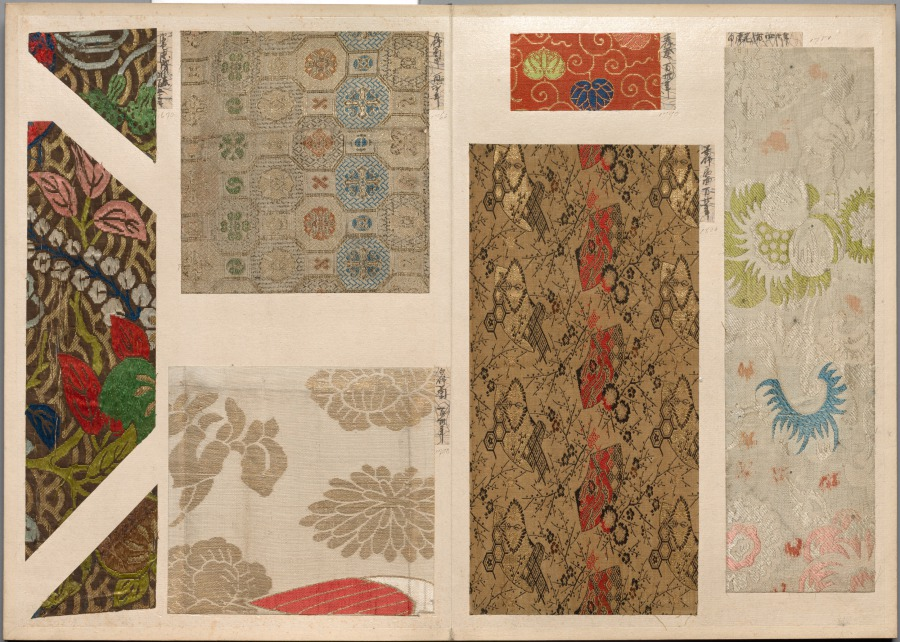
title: Album of Textile Samples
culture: Japan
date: 1790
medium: silk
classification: Textile